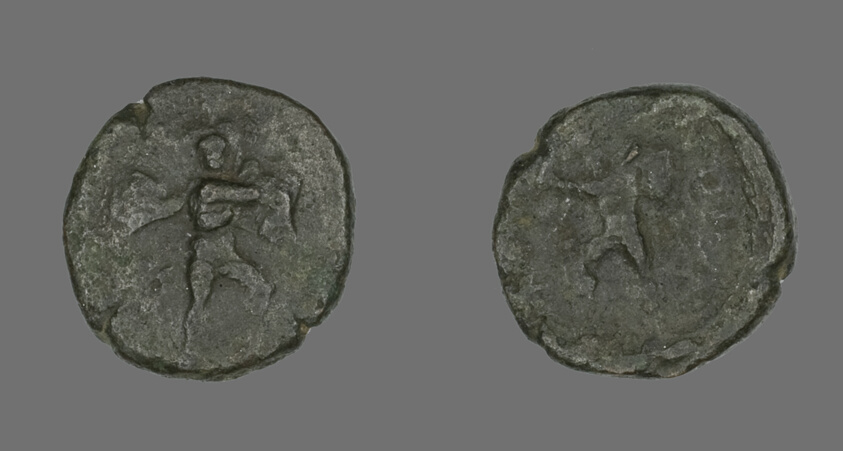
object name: Coin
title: Coin Depicting the Catanian Brothers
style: roman (ancient, style or period), ancient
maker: Roman, minted in Catana, Sicily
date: 3rd-2nd century BCE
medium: Bronze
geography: Roman Empire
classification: coin; ancient art